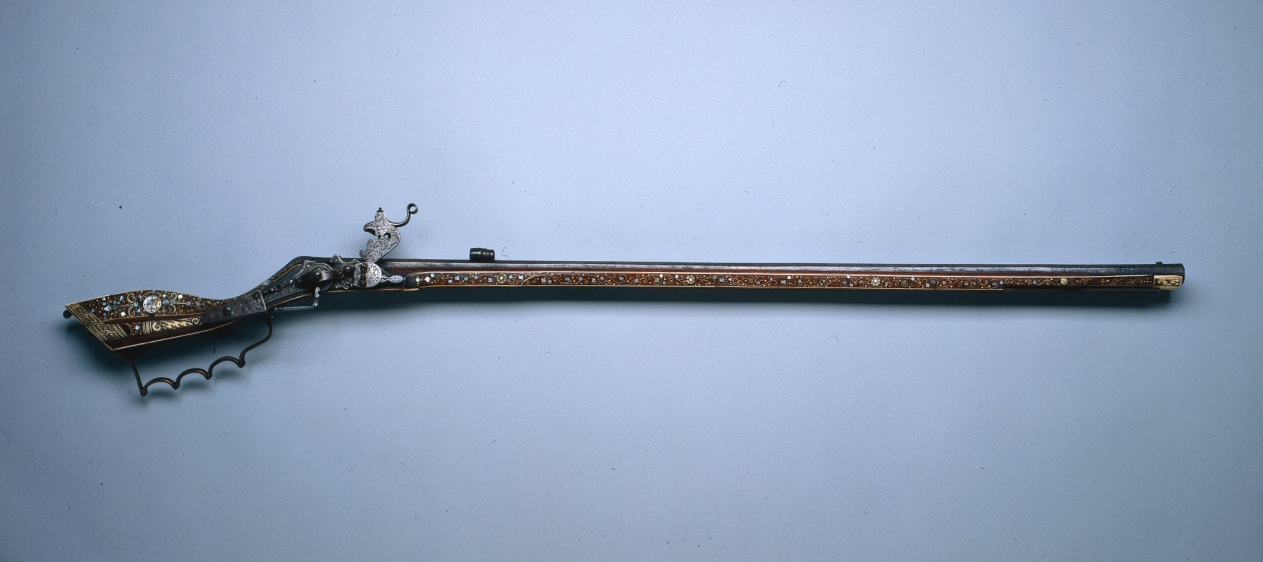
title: Tschinki (Wheel-Lock Hunting Rifle)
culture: Poland, Silesia, 17th century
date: c. 1630–50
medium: steel with traces gilding; walnut stock inlaid with bone, stag horn, mother-of-pearl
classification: Arms and Armor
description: This type of hunting gun owes its name to the town of Teschen in Silesia (now southern Poland) which, as early as 1580, was already associated with a particular type of gun. The precise date of the invention of the Tschinke is unknown, though a dated example of 1610 survives in the Imperial Armouries in Vienna.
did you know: At over four feet long, this rifle's scale is only outdone by the fine details of the gilding and inlaid precious materials. This weapon is known for the region in which it was made and popularized.